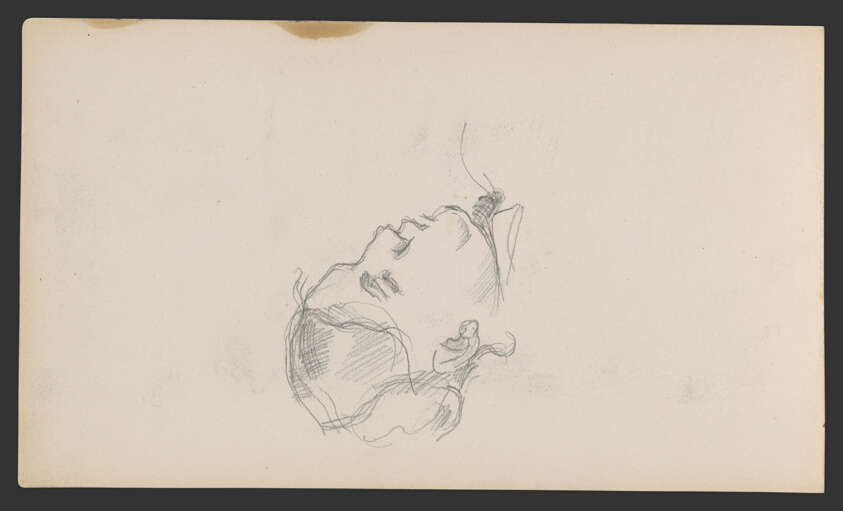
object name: Drawing and Watercolor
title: Sketchbook No. 2 (L'Estaque)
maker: Paul Cézanne; French, 1839-1906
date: 1875–86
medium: Graphite and pen and ink drawings on paper, bound into a book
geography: France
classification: sketchbook; graphite; prints and drawing; paper